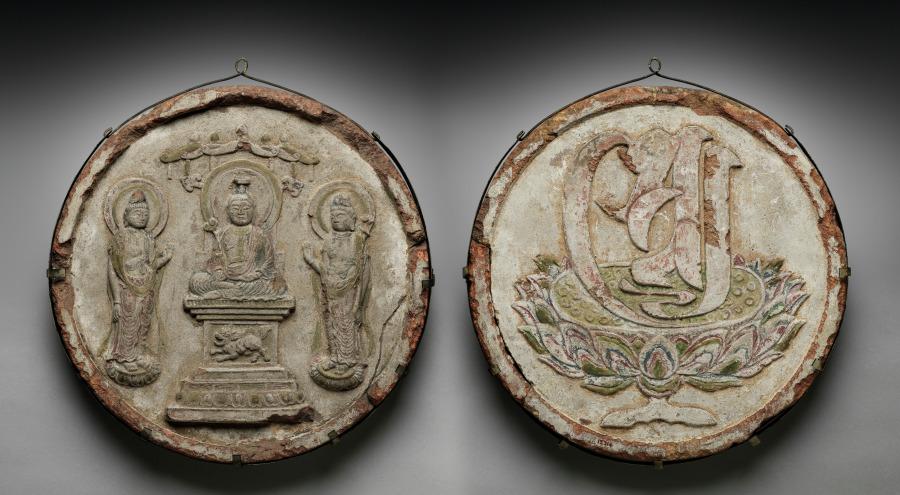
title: Monju Triad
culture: Japan, Meiji period (1868–1912)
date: ?1868–1912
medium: Earthenware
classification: Sculpture